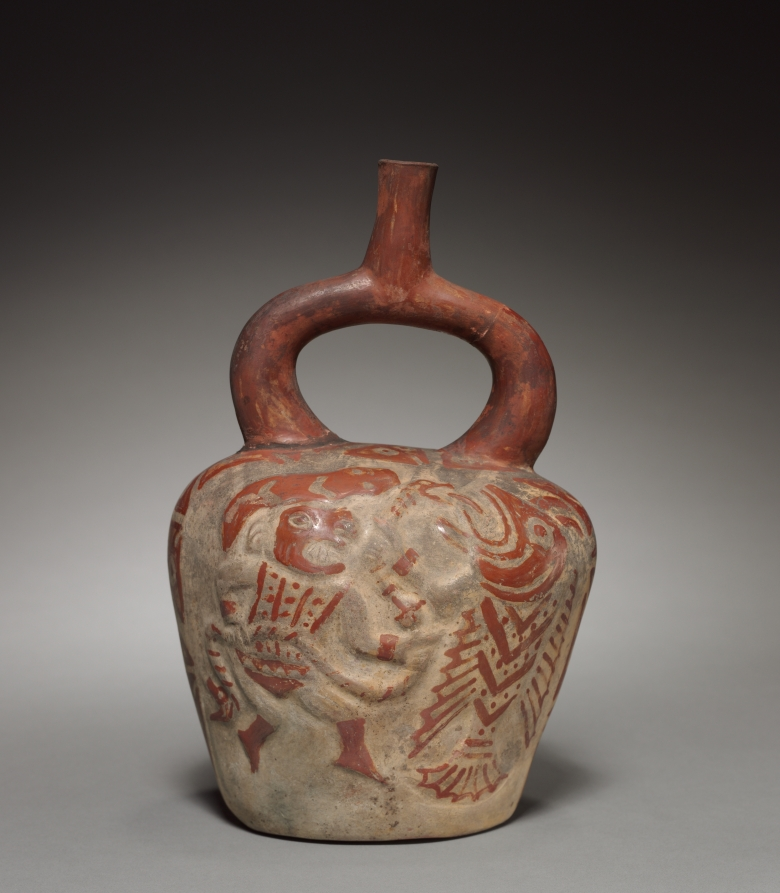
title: Bottle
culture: Peru, Chimú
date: c. 300–500 CE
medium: pottery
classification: Ceramic